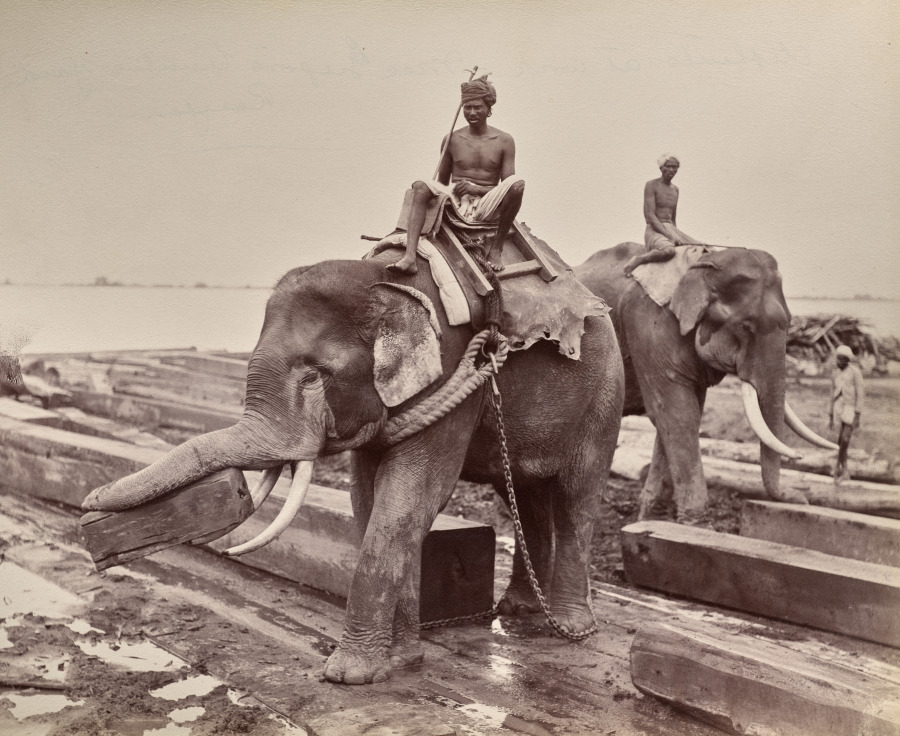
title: Untitled (elephants moving blocks of wood) (recto)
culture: England, 19th century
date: 1870s-1880s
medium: albumen print mounted on an album page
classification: Photograph